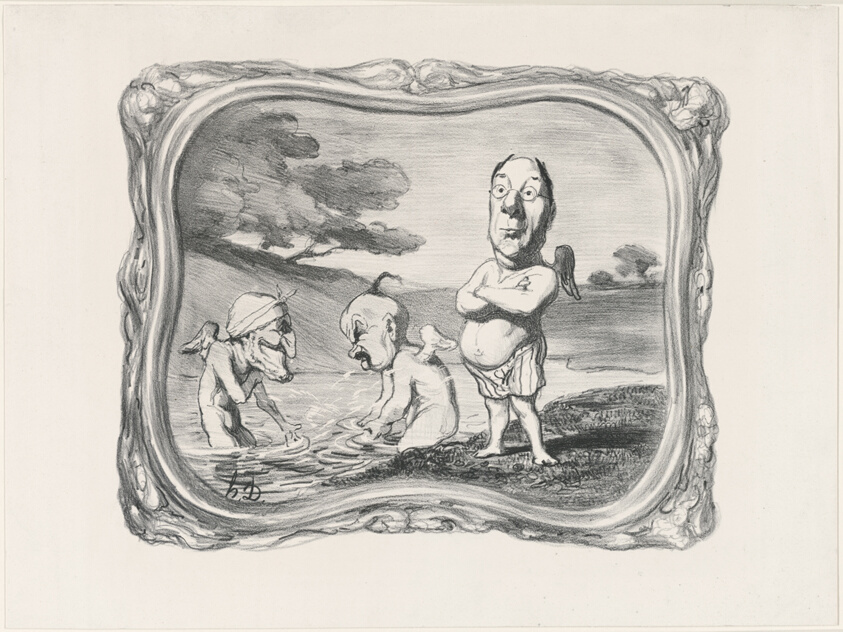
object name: Print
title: Neighborhood nymphs, come discreet nymphs Laboulie in these places arrayed with his glasses, Shows himself to your glances in uncovered masses A young journalist who, leaving the unsullied water having hardly given his signature Dries his fine torso in the sun, plate 5 from Idylles Parlementairesa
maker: Honoré Victorin Daumier; French, 1808-1879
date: 1850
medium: Lithograph in black on white wove paper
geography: France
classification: lithograph; print; prints and drawing